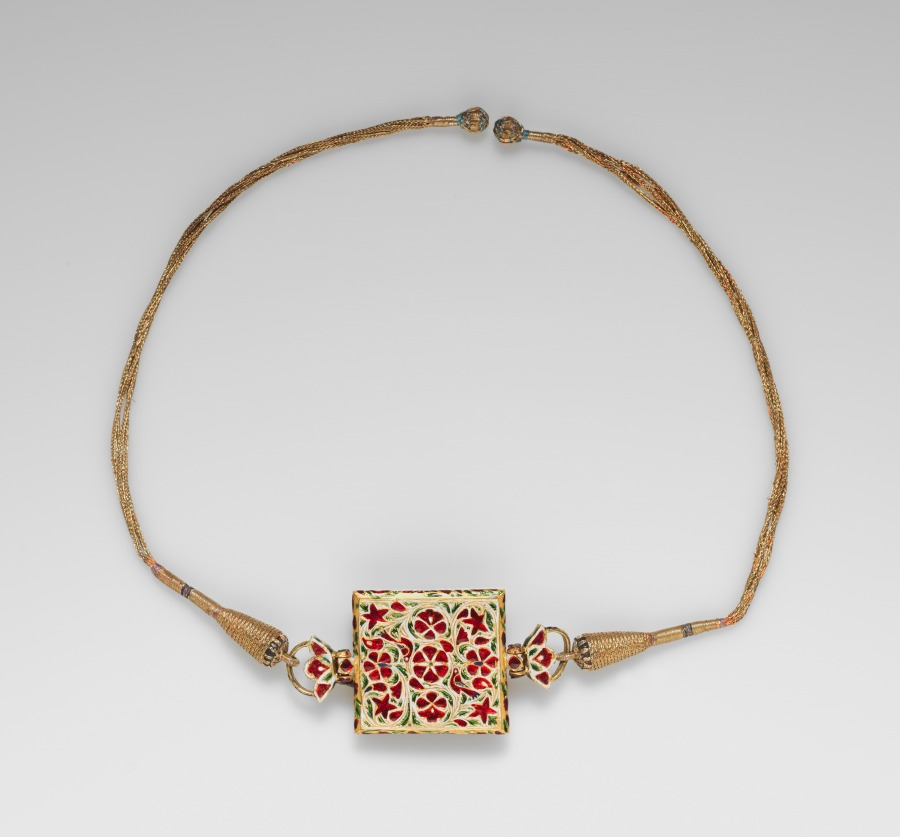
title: Wristlet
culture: India, Punjab (?)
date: 18th Century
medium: silver gilt with semiprecious stones and enamel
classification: Jewelry